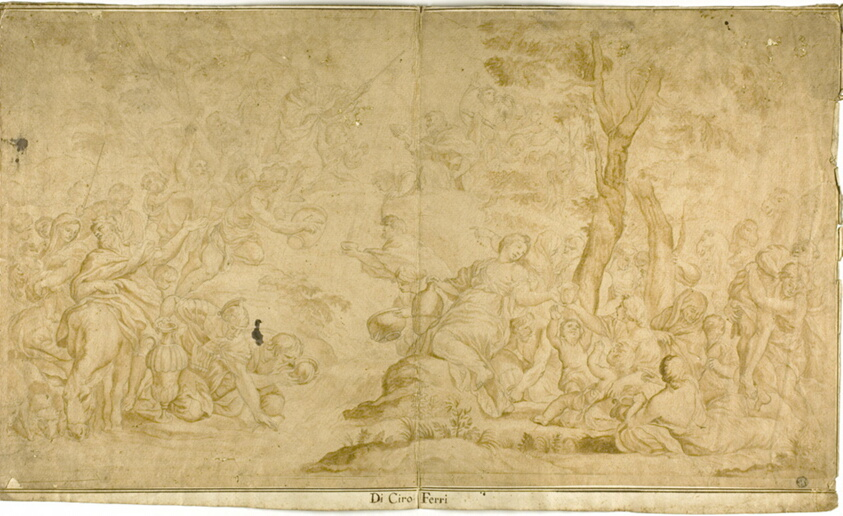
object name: Drawing and Watercolor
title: Moses Tapping the Rock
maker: After Ciro Ferri; Italian, 1634-1689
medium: Black chalk, with brush and brown wash, on tan laid paper, laid down on ivory laid paper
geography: Italy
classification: ink or chalk wash; drawings (visual works); prints and drawing